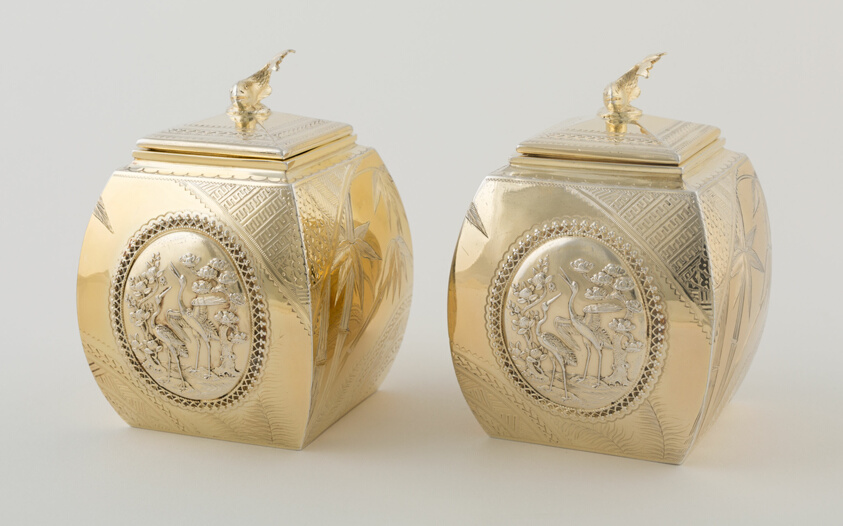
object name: Metalwork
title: Pair of Tea Caddies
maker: William Barnard; English, active 1767-1818; London, England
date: 1878/79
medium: Silver gilt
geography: London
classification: teaware; silver; metalwork; european decorative arts